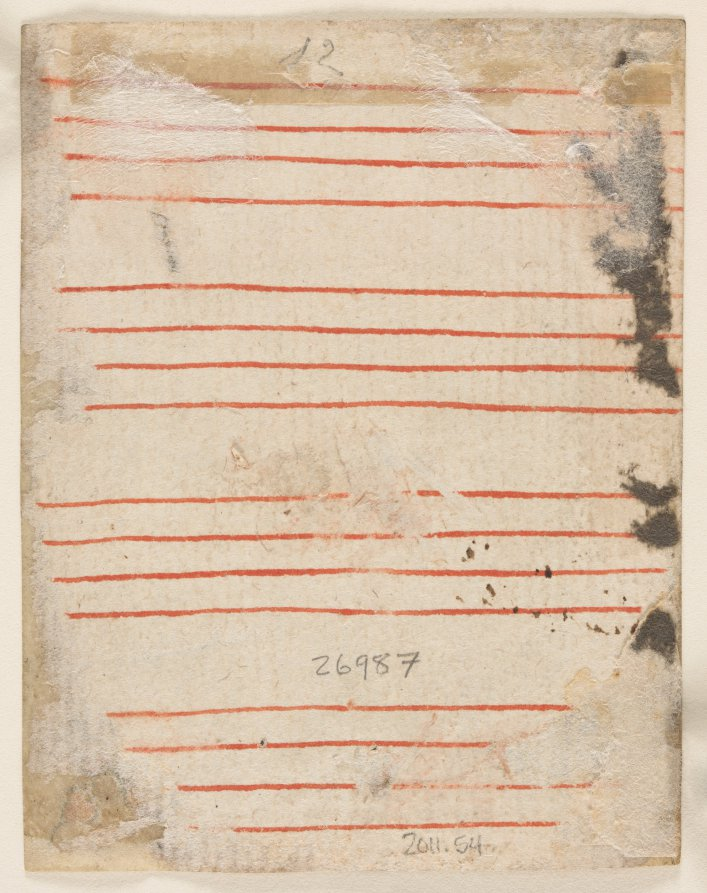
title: Leaf from a Psalter: The Crucifixion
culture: Flanders, Liège, 14th century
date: c. 1300–1330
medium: ink, tempera and gold on vellum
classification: Manuscript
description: The diocese of Liège was extremely active as a production center for psalters and psalter-hours from the second half of the 1200s through about 1330. This market, no doubt, was stimulated by the need of women for a devotional text. As women were drawn to the convents of religious orders such as the Dominicans, the Beguines and Begards, and the Poor Clares, they had need of a book that would provide them with suitable devotional material. The psalter was the book that these women, many of whom were high-born, most commonly used. The present leaf, with its monumental miniature of the Crucifixion, and like many surviving 13th-century psalters, may have thus provided visual focus for the prayers of a woman in a convent setting. Customarily, the level of quality and the extent to which these books were decorated depended upon the means of the patron.